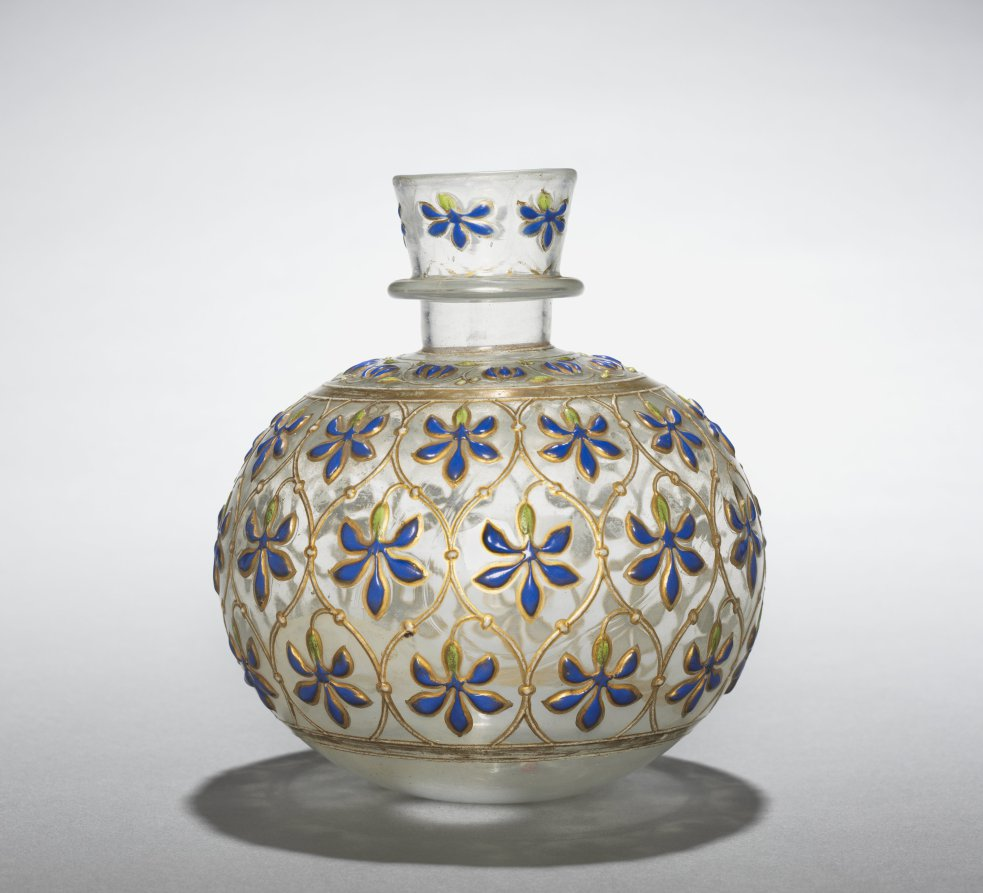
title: Hookah Base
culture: India, Mughal Dynasty (1526-1756)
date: early 1700s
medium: Glass with colored enamel and gilding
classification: Glass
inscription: Translation of inscription: "In the name of God, the element, the merciful, Is the key to the wise treasure"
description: Smoking tobacco was introduced to the Mughal court from Iran in the very early 1600s and soon became popular. This base formed part of a hookah, or water pipe, which consisted of a base that held water—sometimes perfumed with herbs or fresh fruit—a detachable bowl to hold tobacco, and a long tube. Early hookahs used existing vessels for bases, including coconut shells. By the late 1600s or early 1700s, richly decorated pieces like this were produced. The jewel-like decoration of blue and green blossoms evokes a garden in which a smoker might have sat.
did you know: Turquoise five-petaled flowers hang from lime green pedicels.